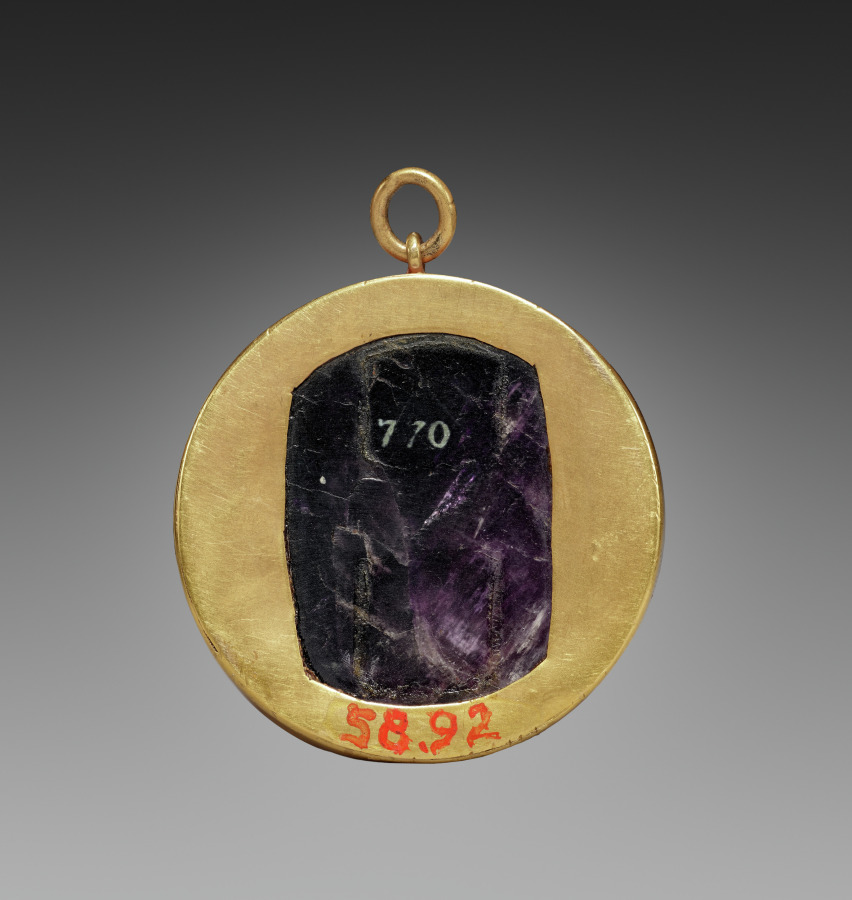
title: Cameo: Head of a Woman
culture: Italy, Roman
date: 1–100 CE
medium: amethyst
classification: Jewelry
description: This carved amethyst cameo depicts a woman wearing a laurel wreath and a palla, a cloak worn by Roman noblewomen. The palla is tucked behind the woman’s ears and is visible over her right shoulder. She may have been a member of the Julio-Claudian imperial family or a wealthy private individual. In her hairstyle, straight nose, and small but full mouth the woman closely resembles portrait cameos identified as Antonia Minor, niece of the emperor Augustus and mother of the emperor Claudius. Only elite Romans could use amethyst; true purple stones had to be imported to Rome at great expense.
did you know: The metal setting is modern; this gem was likely originally a roundel.